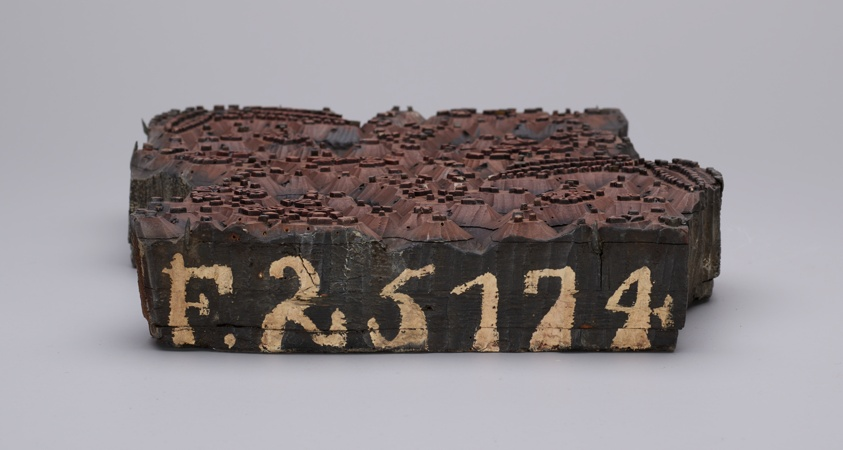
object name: Textile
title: Six Printing Blocks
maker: England or France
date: before 1850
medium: Carved wood, treated in a variety of techniques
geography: England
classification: printing blocks (printing surfaces); textile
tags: paisley